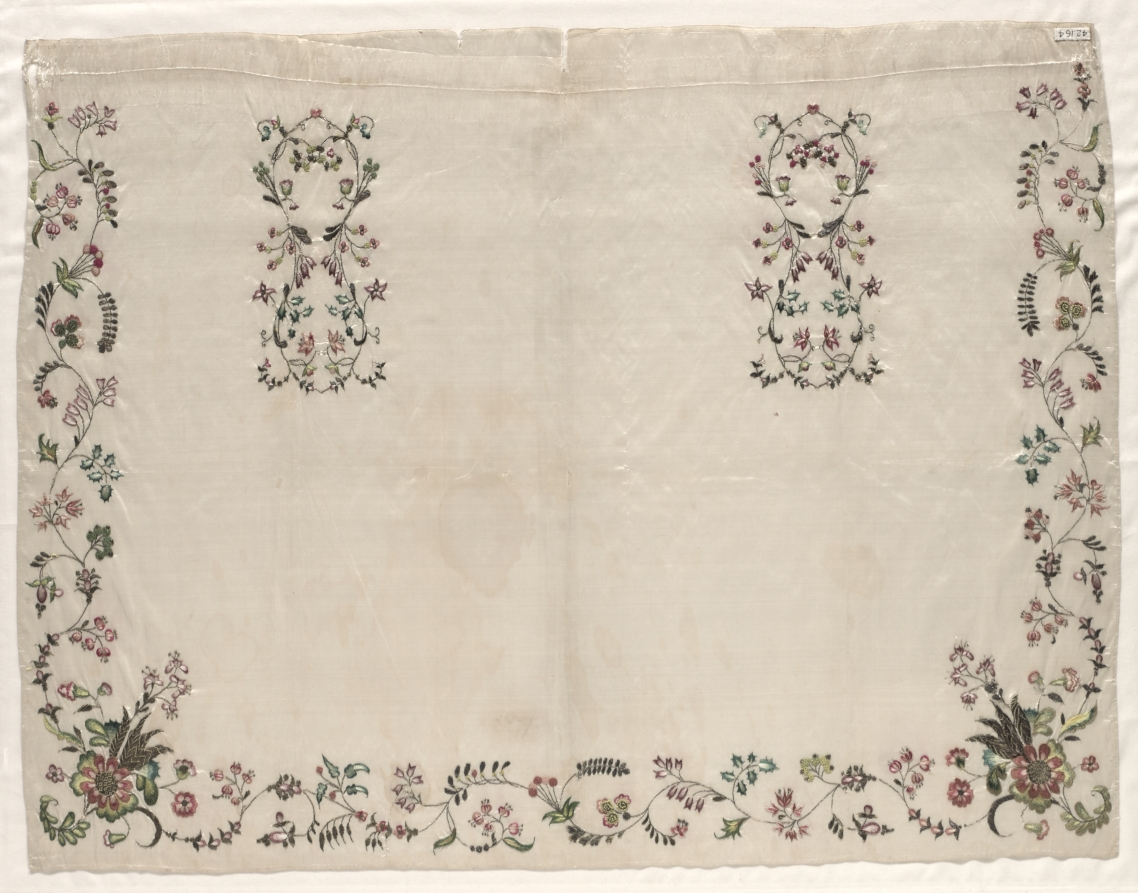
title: Apron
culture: England, 18th century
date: 1700s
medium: embroidery, silk and gold thread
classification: Embroidery